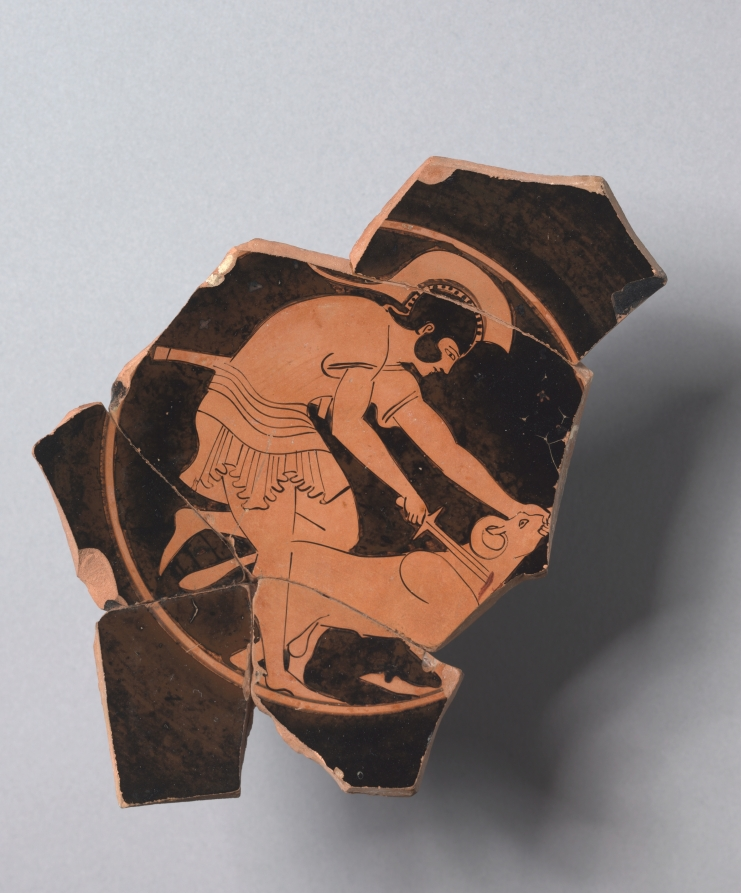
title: Fragmentary Red-Figure Kylix (Drinking Cup): Warrior Sacrificing Ram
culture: Greek, Attic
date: c. 490–480 BCE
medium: ceramic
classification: Ceramic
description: Scenes of sacrifice are rare in Greek art before the late 4th century BC. The warrior may be sacrificing the ram as a magical act before battle to save his own and his company's lives. A faded inscription, partly lost, does not identify the warrior; rather, it praises Chairias, probably an Athenian youth. Enough remains of the exterior of the cup to show that it was undecorated.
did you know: The artist has used added red pigment for the blood of the ram.